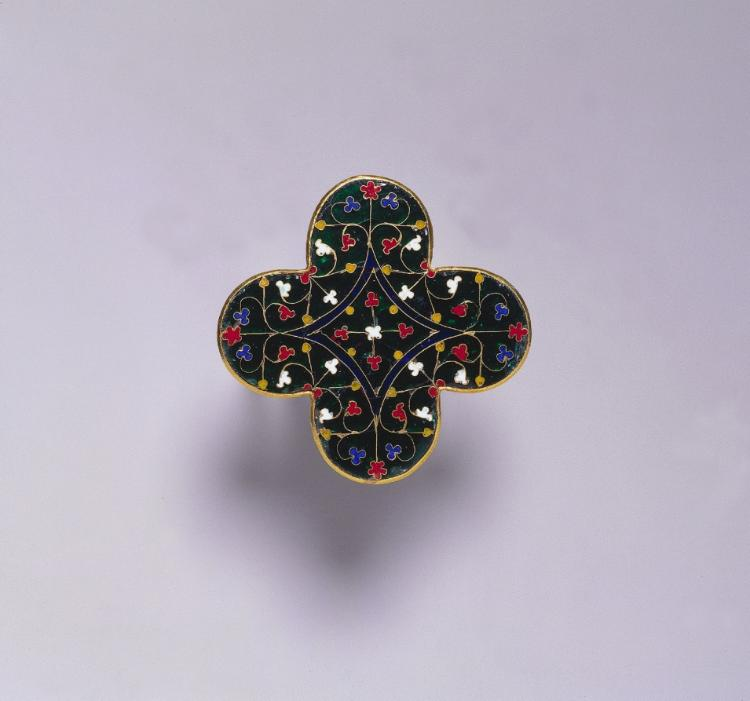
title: Quatrilobed Plaque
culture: France, Paris, Ile-de-France, Gothic period, early 14th century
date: c. 1280–1300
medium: Gold, translucent enamel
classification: Metalwork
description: This rare four-lobed plaque is a superb example of émail de plique, a virtuoso enameling method popular in Paris during the late 1200s with the court of Philip the Fair (reigned 1285–1314). Plaques like this were prepared in advance to be attached to larger works including crosses, chalices, reliquaries, or even sewn into precious fabrics for decoration. Given the very distinctive shape of this plaque it is certain to have been created for a specific commission.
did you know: Julien was not the only artisan to produce émaux de plique; therefore, an exact attribution to an artist is problematic.